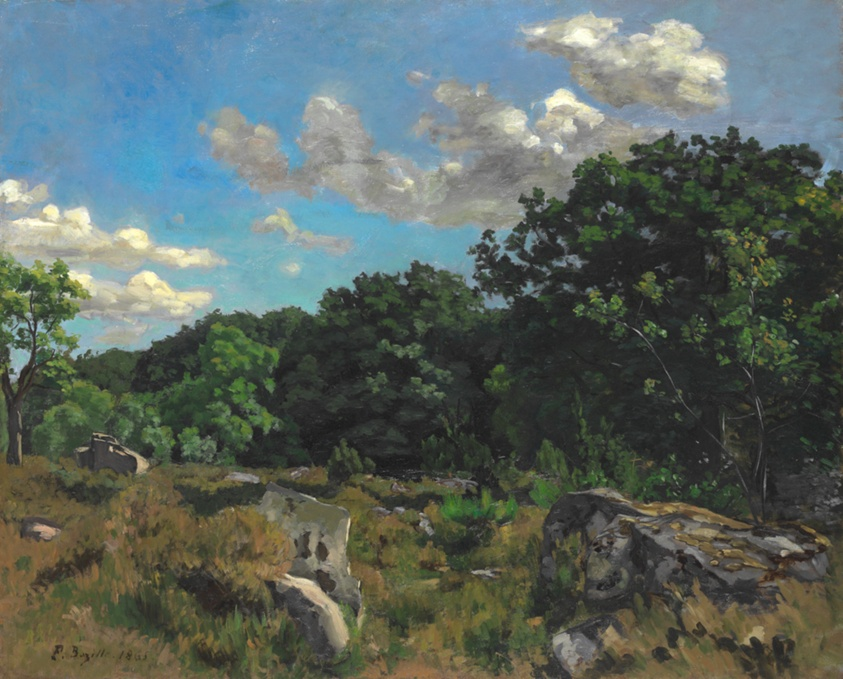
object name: Painting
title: Landscape at Chailly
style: Impressionism, 19th century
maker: Frédéric Bazille (French, 1841-1870)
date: 1865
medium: Oil on canvas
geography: France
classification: oil on canvas; french; paint; painting; european painting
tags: weather/seasons, summer, forests, foliage, clouds, rocks, trees, landscapes